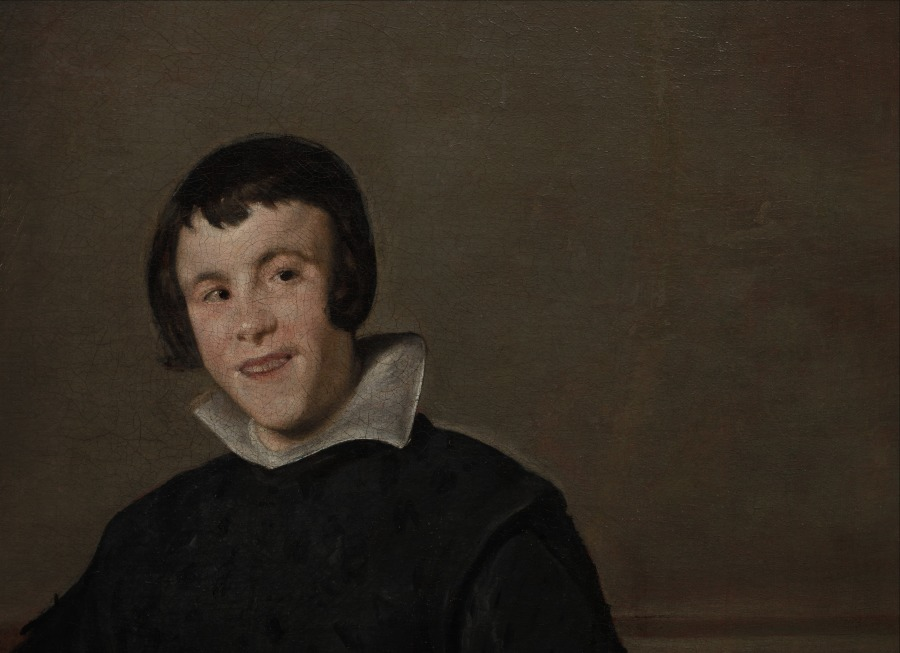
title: Portrait of the Jester Calabazas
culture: Spain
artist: Diego Velázquez (Spanish, 1599–1660)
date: c. 1631–32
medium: oil on canvas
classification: Painting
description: Calabazas, a jester in the court of King Philip IV of Spain, had physical and mental disabilities, a state that the artist emphasizes, rather than tries to hide. While the Spanish court prized and doted upon people with disabilities such as Calabazas, Velázquez transformed their depiction in portraiture. This startling work uses the format of the formal, full-length court portrait to present a type of person who was generally perceived as marginal at this point in history and profoundly humanizes him.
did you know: Calabazas holds a wind-driven pinwheel and a miniature portrait of a woman, together suggesting the inconstancy of love.